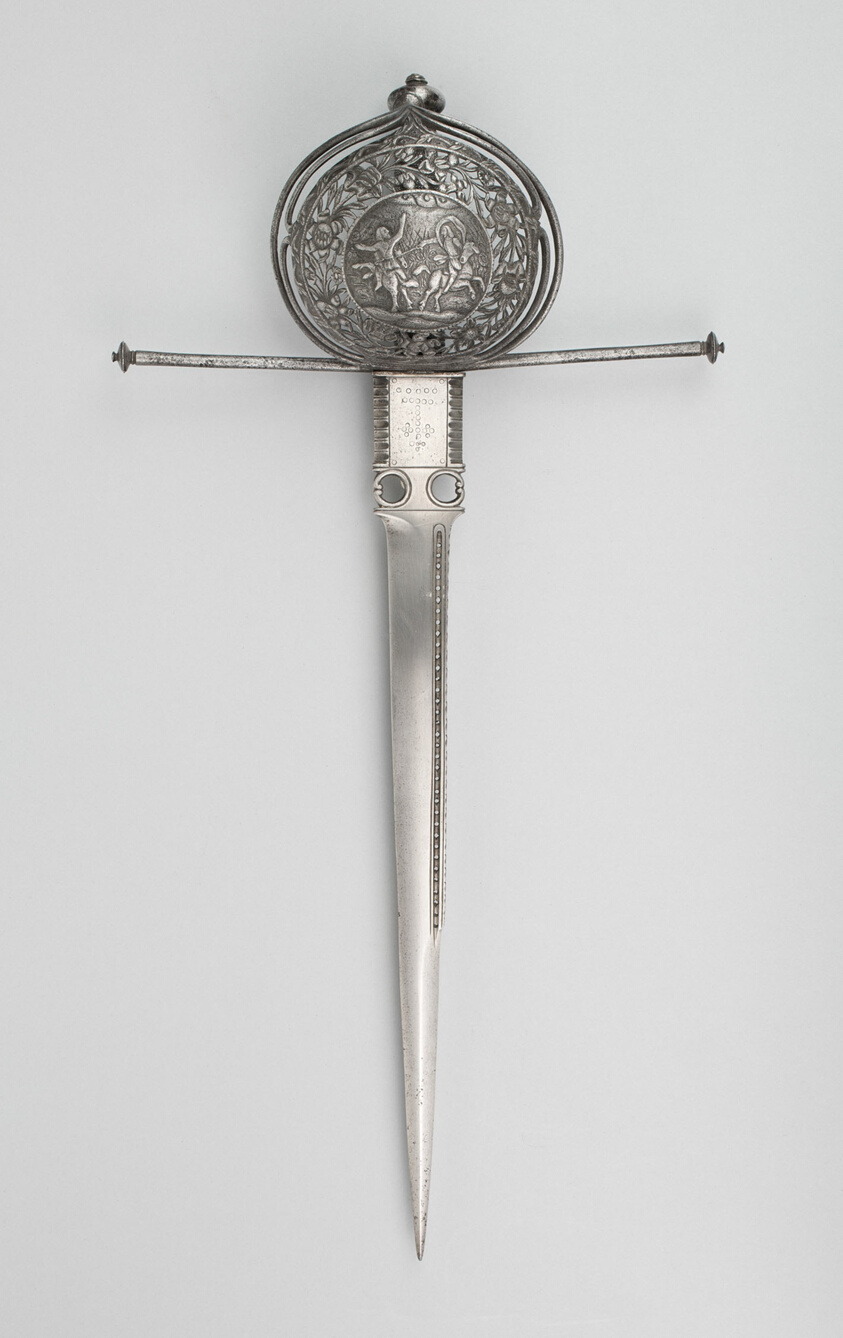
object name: Arms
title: Parrying Dagger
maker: Spanish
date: 1650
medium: Steel, wood, and iron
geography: Spain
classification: edged weapon-dagger; arms; arms and armor